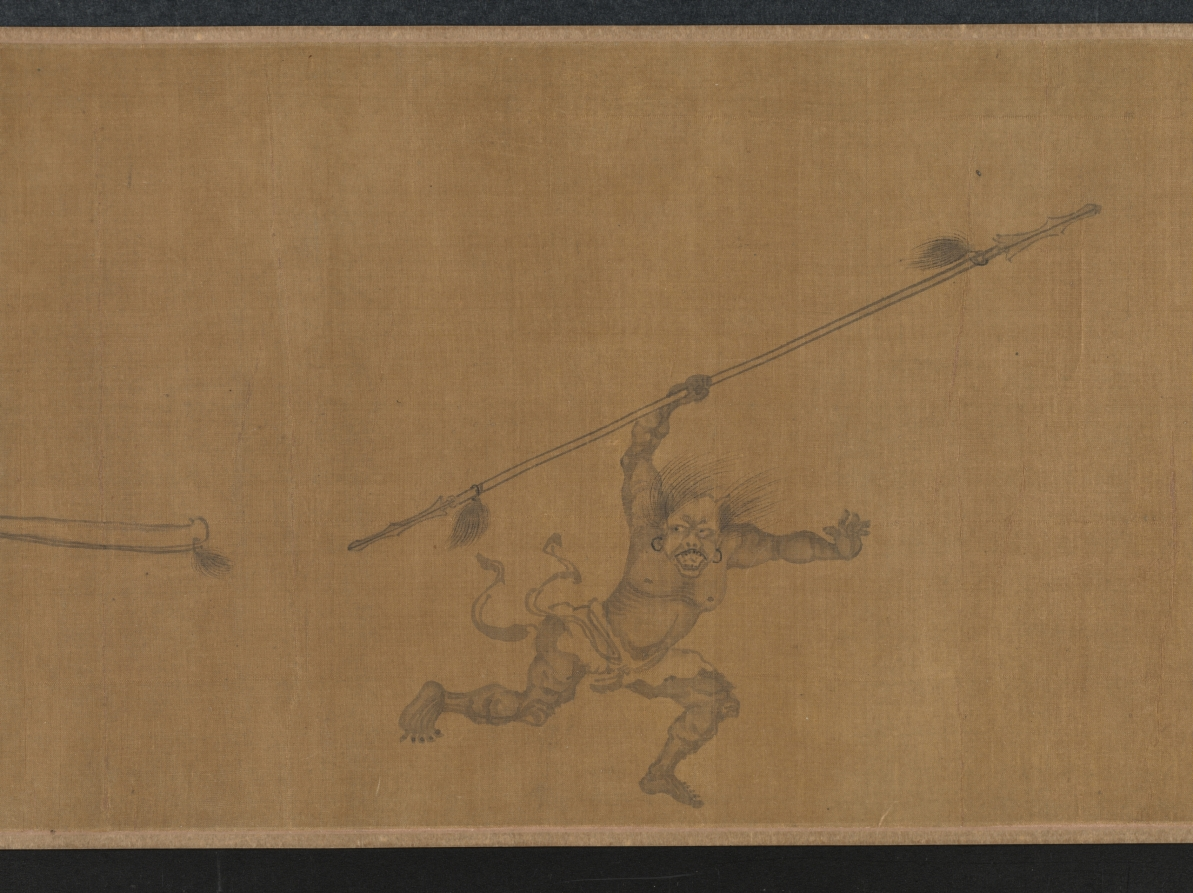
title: The Lantern Night Excursion of Zhong Kui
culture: China, Yuan dynasty (1271-1368)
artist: Yan Hui (Chinese, active 1270–1310)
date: late 1200s–early 1300s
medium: handscroll; ink and slight color on silk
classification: Painting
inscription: Artist's signature [and probable seal]: Yan Qiuyue 顏秋月 Title on frontispiece and 1 seal of Niu Shuyu 鈕樹玉 (1760–1827): Qiuyue mohuan 秋月墨幻 [Qiuyue's Ink Fantasy]. 31 additional seals: 2 of Yang Shiqi 楊士奇 (1365–1444); 2 of An Guo 安國 (1481–1534); 8 of Xiang Yuanbian 項元汴 (1525–1590); 2 of Geng Zhaozhong 耿昭忠 (1640–1686); 4 of Pu Tung 溥侗 (1870–1952); 7 of Tan Jing 譚敬 (1911–1991); 1 of Liu Ting-chih (20th c.); 5 unidentified.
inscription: An inscription by Zizhi Shanren 紫芝山人 [probably Jiang Hui 蔣惠], dated 1389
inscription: An inscription by Wu Kuan 吳寬 (1436–1504)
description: Here, the demon queller Zhong Kui leads a nightly procession of street entertainers with bare, muscular bodies and demonic faces. Some wear shabby clothes, and all perform stunts and tricks to astound and scare the viewer. In fact, a New Year custom in cities of southeast China had the poor, disguised as demons, process through the streets and play their tricks to clear households of evil spirits and welcome the spring. From right to left, a demonic figure leads the procession and beats a drum; another lifts a large rock; one stands on his hands trying to drink; one balances a jar on his elbow; three hold and wield weapons; one carries a folded chair covered by a cow’s skin; another holds Zhong Kui’s qin (zither), books, brush, and inkstone. At the end of the scroll, two figures offer a cup and bottle of wine to Zhong Kui, who lifts his hand in command.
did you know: Zhong Kui was an ancient ghostbuster.